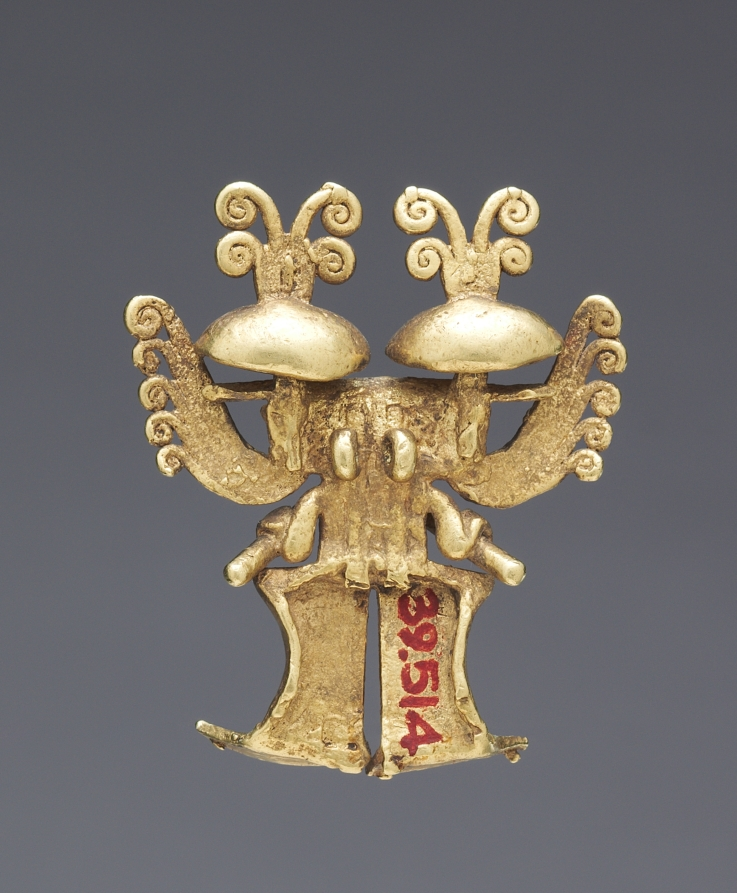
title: Animal-Headed Figure Pendant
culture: Colombia, Quimbaya or Yotoco style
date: 1–800 CE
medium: cast gold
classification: Metalwork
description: The same creature, nasty but precious, appears in both pendants (1939.515). Human in its posture and arms, its head is that of an animal with a long, toothy snout. It holds batons to its mouth, and whiskers or ears flare from the sides of the head. The little headdress domes are mystifying; they have been described as mushrooms, gourds, and ceramic vessels, among other things.